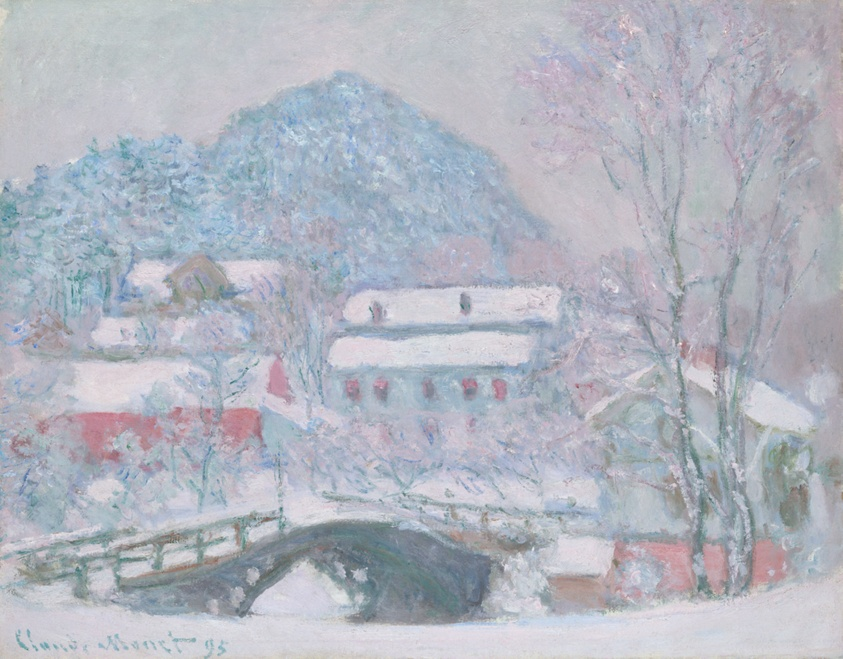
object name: Painting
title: Sandvika, Norway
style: Impressionism, nineteenth century, 19th century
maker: Claude Monet (French, 1840–1926)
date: 1895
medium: Oil on canvas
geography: France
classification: oil on canvas; french; paint; oil paintings (visual works); painting; european painting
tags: landscapes, winter, white (color), tree of life, towns, snow, red (color), buildings, building, bridge, weather/seasons